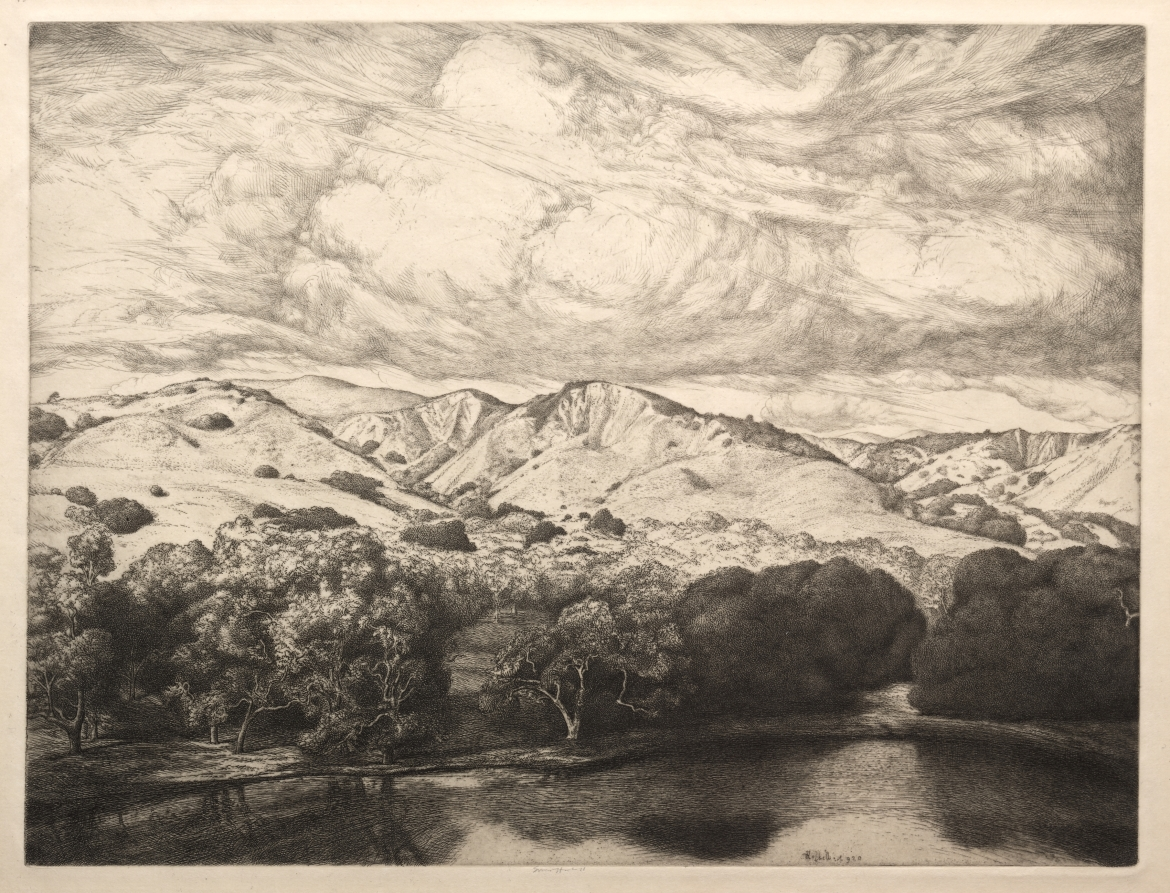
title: Mirror of the Goddess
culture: America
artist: Ernest Haskell (American, 1876–1925)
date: 1920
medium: etching and engraving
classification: Print